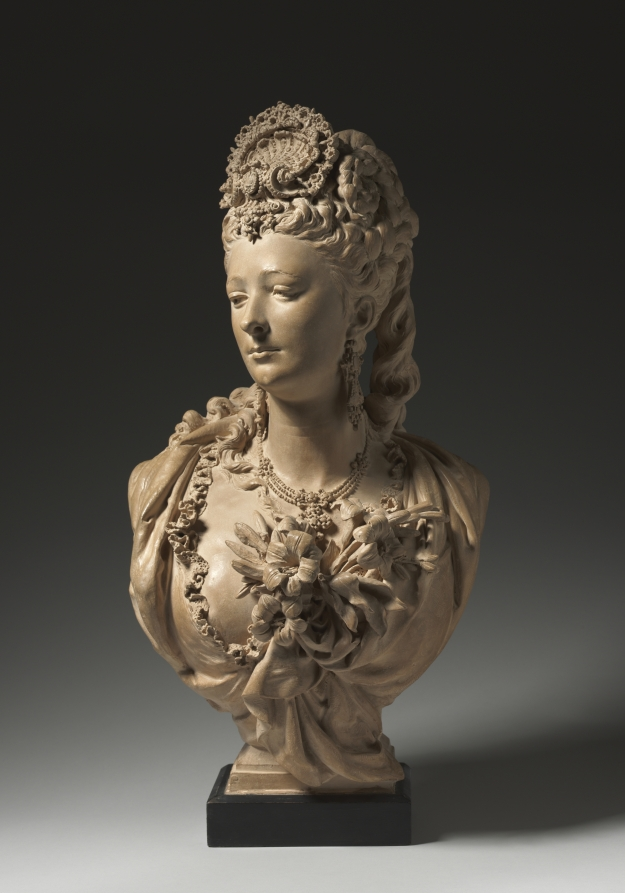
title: Portrait Bust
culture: France, 19th century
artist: Albert-Ernest Carrier-Belleuse (French, 1824–1887)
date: c. 1865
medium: terracotta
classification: Sculpture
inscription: incised in the clay on the back: "A. Carrier"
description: Among the artists who reacted against the static poses of neoclassical art, Carrier-Belleuse drew inspiration from the opulence and excess of Rococo portraiture of the 1700s. This bust resembles one of Napoleon III's mistresses, Marguerite Bellanger, whose features the artist is known to have borrowed for his female busts. Carrier-Belleuse received commissions from Napoleon III, ruler of France from 1852 to 1870, and contributed to the sculptural decorations of the Louvre and Opera Garnier in Paris.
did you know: The possible muse for this bust, Virginia Oldonia, was a countess know for her drama and costumes.